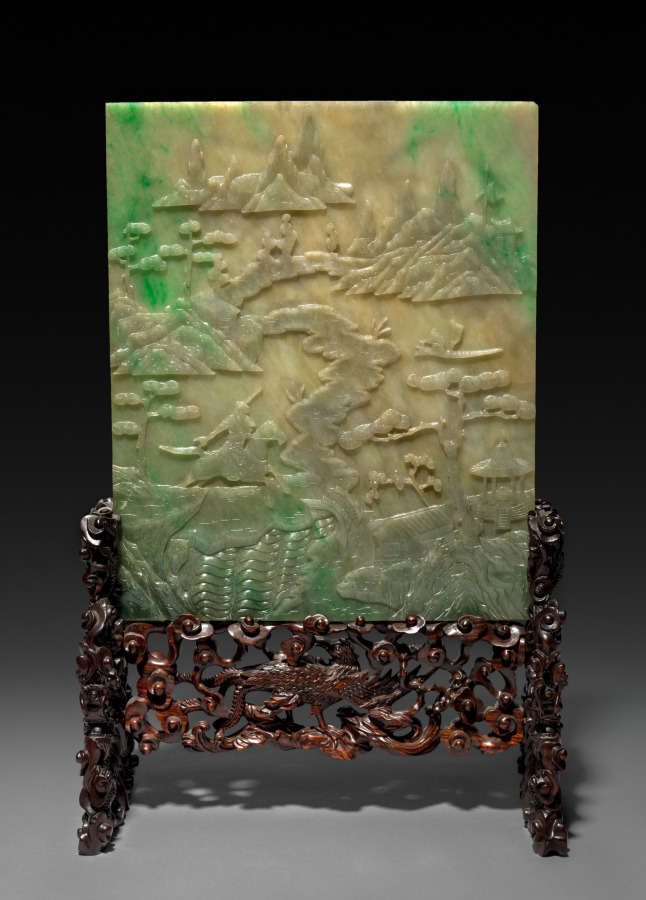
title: Table Screen with Stand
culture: China, Qing dynasty (1644-1911)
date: 1644–1911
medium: jade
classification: Jade